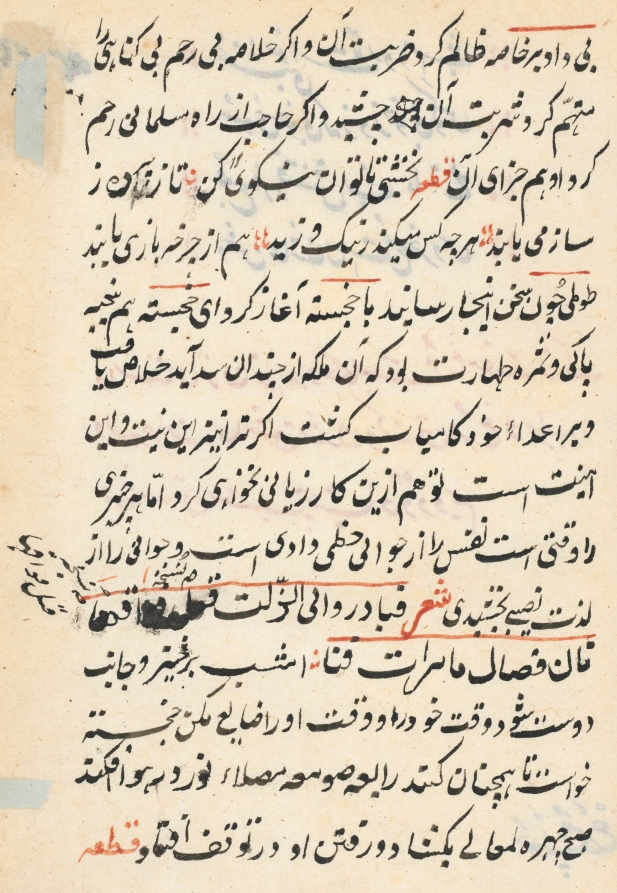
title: Page from Tales of a Parrot (Tuti-nama): text page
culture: Mughal India, court of Akbar (reigned 1556–1605)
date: c. 1560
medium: gum tempera, ink, and gold on paper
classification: Painting